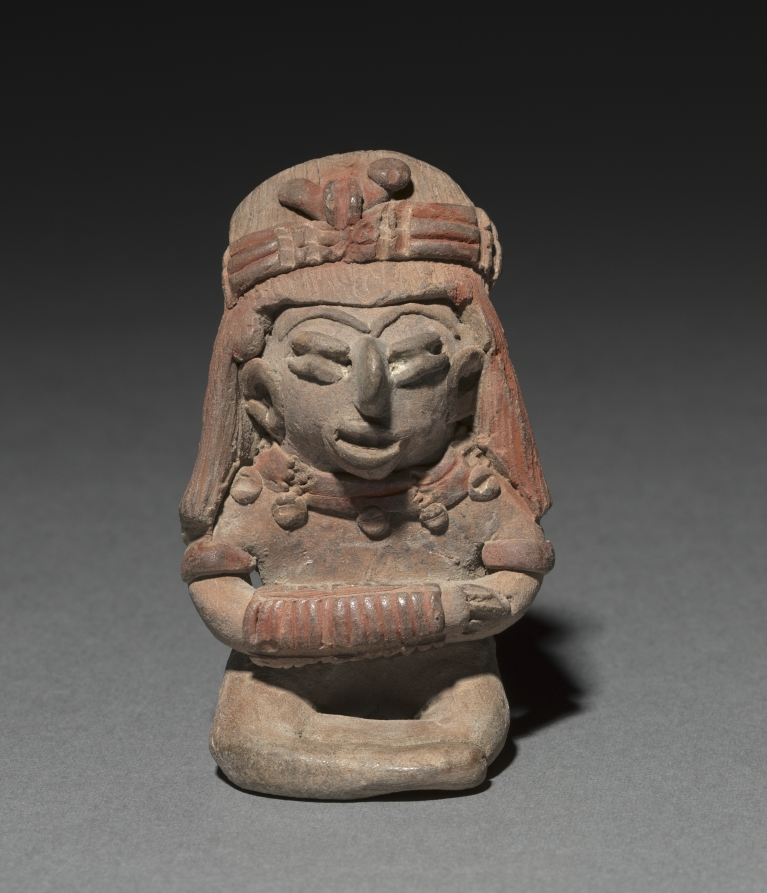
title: Seated Figurine Wearing a Bracelet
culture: Mesoamerica, Guanajuato or Michoacán, Chupícuaro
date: 300 BCE–300 CE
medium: ceramic and pigment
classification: Ceramic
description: Clay figurines were the earliest and most common art form in Mexico and other countries in the ancient Mesoamerican (Middle American) culture region. Made first by hand and later with molds, most figurines belong to the traditions of commoners, such as farmers, rather than those of elites.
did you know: Clay figurines were the earliest and most common art form in the ancient Mesoamerican culture region.